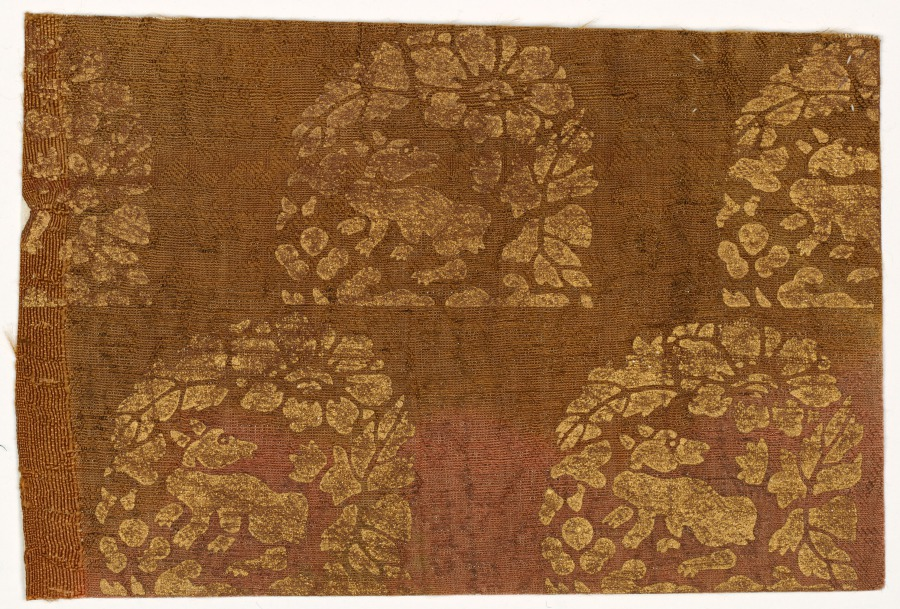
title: Textile Fragment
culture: Japan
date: 1800s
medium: silk damask weave and gold stencil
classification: Textile